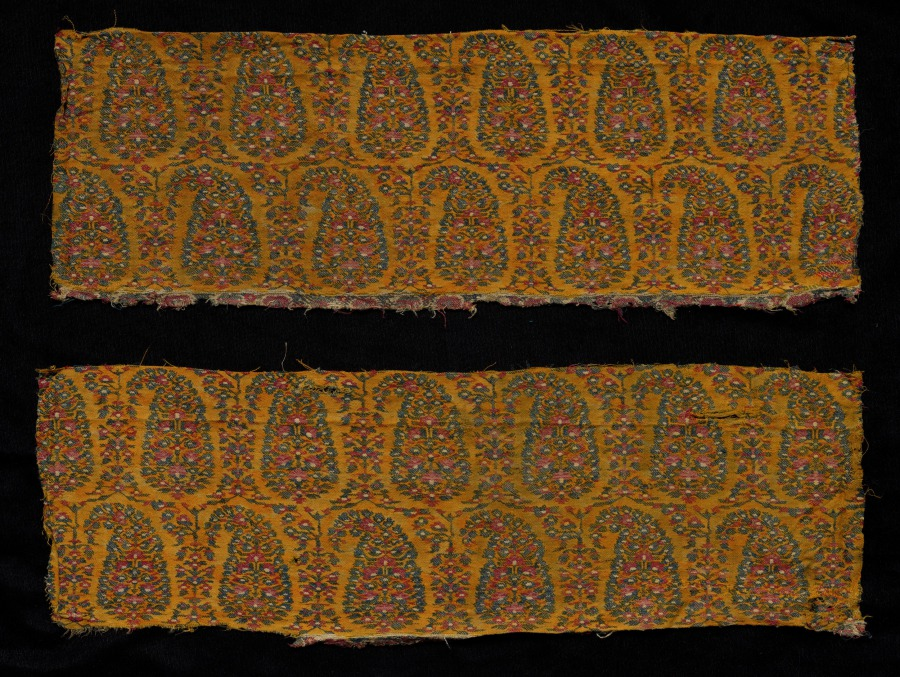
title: Fragment of a Shawl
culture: India, Kashmir, 19th century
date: 1800s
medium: tapestry weave: wool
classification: Textile